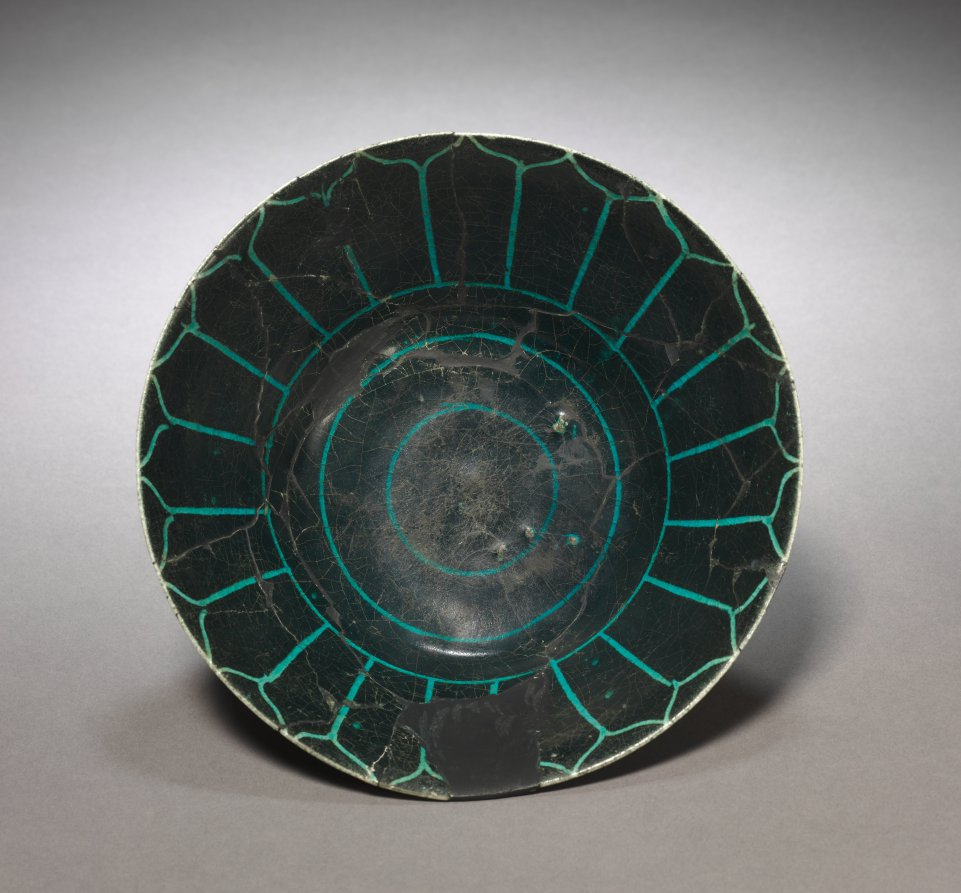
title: Bowl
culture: Iran, Rayy (?), Seljuk Period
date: 1100s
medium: earthenware with underglaze-painted and incised design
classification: Ceramic